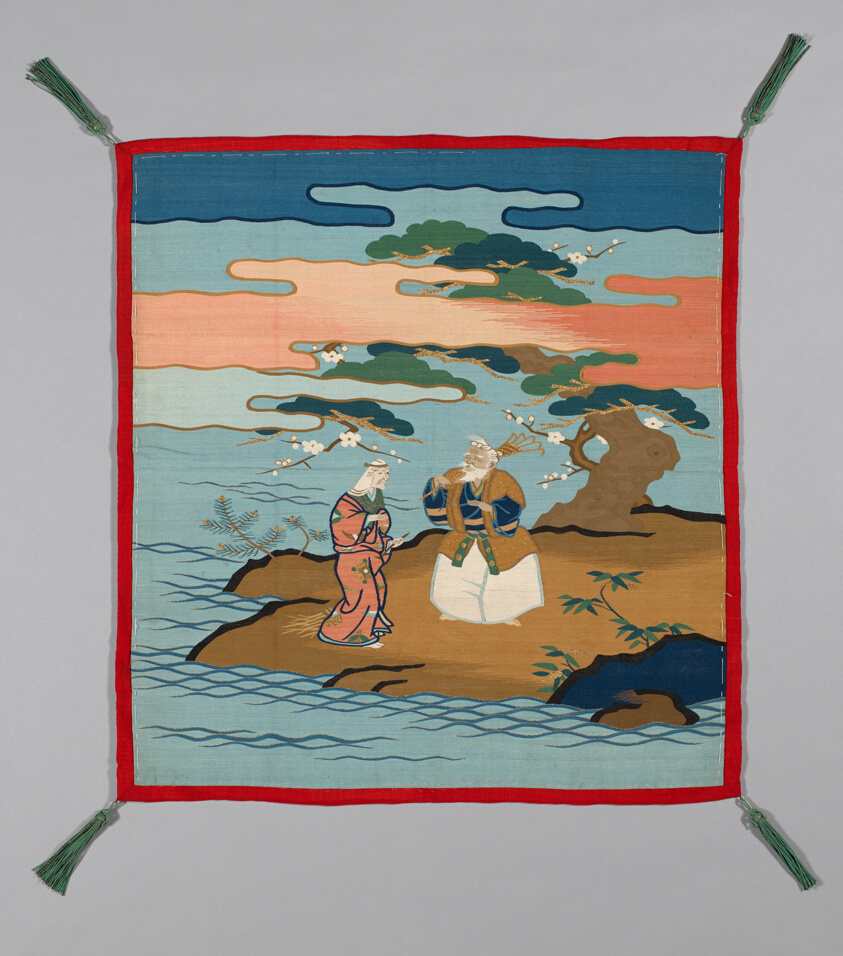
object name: Textile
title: Fukusa (Gift Cover)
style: Japanism, late edo, edo (japanese period)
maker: Japan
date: late Edo period (1789–1868), 1801/25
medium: Silk, gold-leaf-over-lacquered-paper-strip-wrapped cotton and silver leaf-over-lacquered-paper-strip-wrapped silk, slit tapestry weave (kesi); lined; tasseled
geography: Japan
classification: textile; weaving